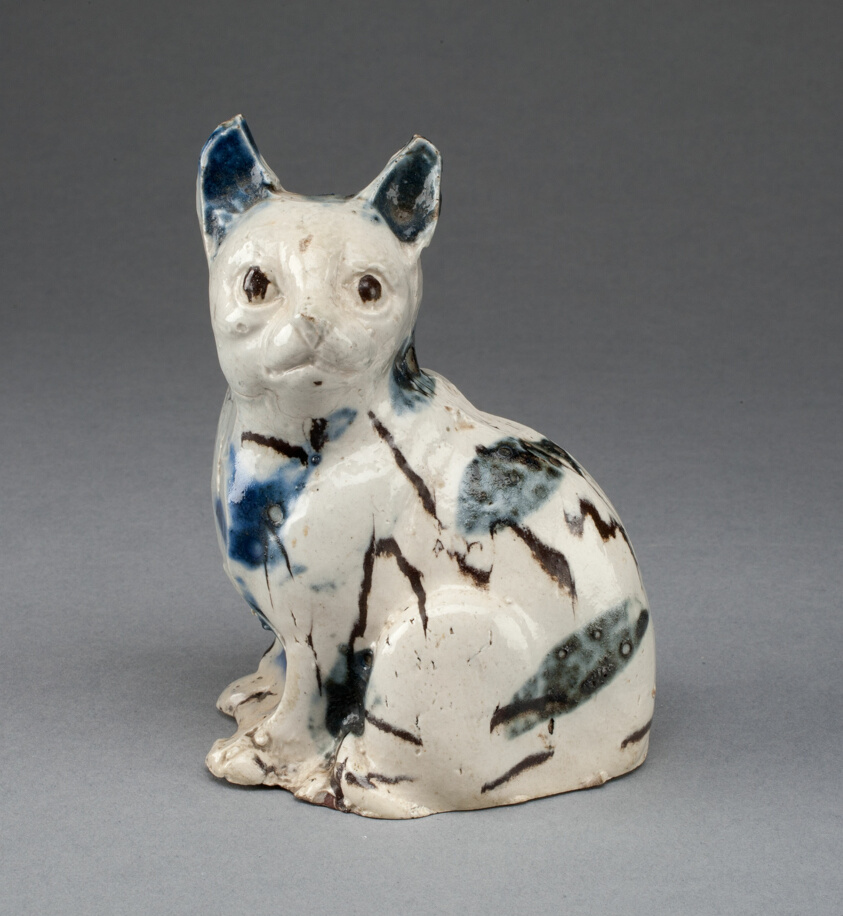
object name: Ceramics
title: Cat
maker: Staffordshire, England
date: c. 1760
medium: Salt-glazed stoneware (agateware)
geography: Staffordshire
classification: stoneware; ceramics; salt-glazed stoneware; agateware; european decorative arts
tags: cats, animals